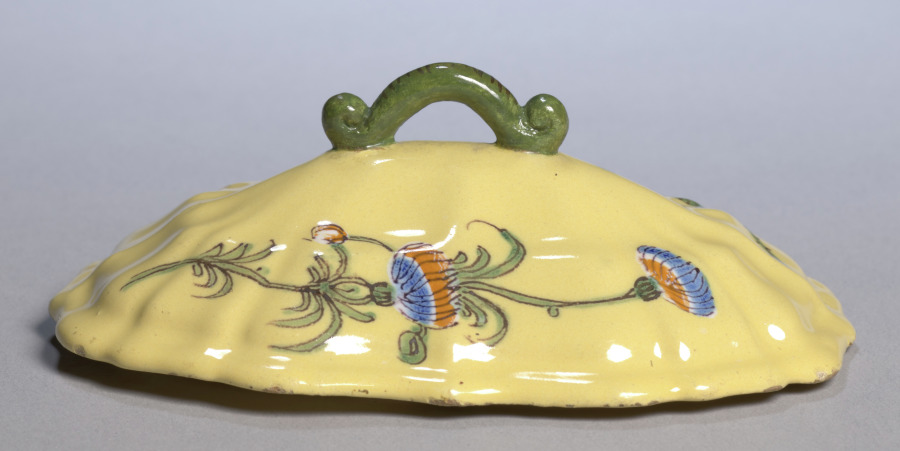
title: Cover for a Spice Bowl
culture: France, Montpellier, 18th century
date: c. 1775–80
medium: faience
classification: Ceramic